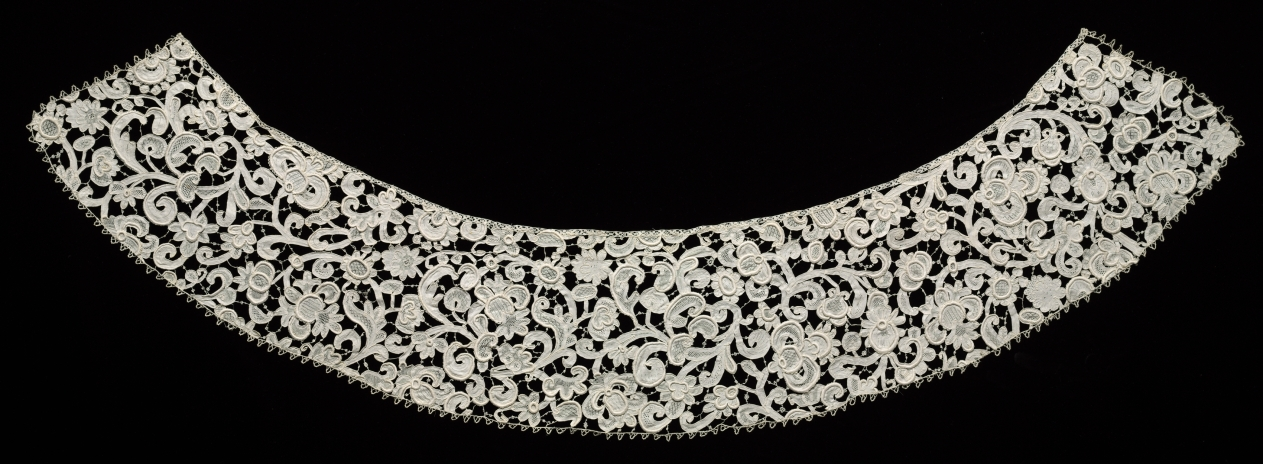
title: Lace Collar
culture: Italy, Venice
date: 1600s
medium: Linen: needle lace (Venetian raised point)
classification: Lace